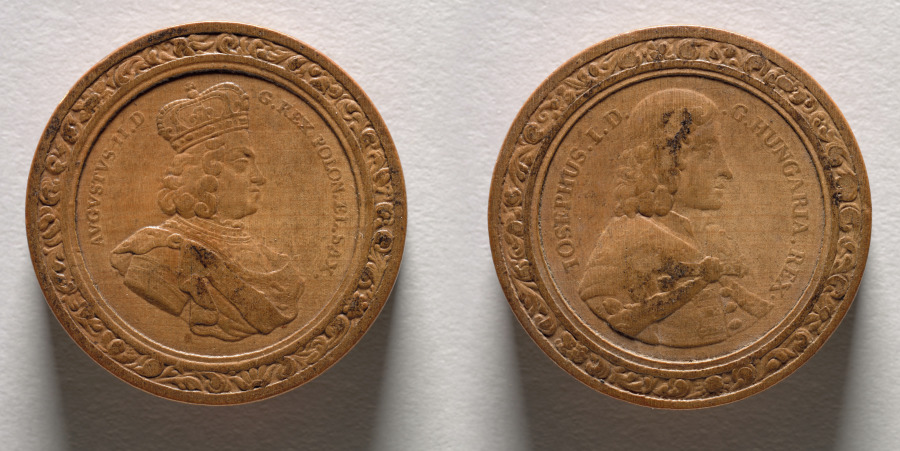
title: Gaming Piece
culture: Germany, late 17th-early 18th Century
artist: Martin Brunner (German, 1659–1725)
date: c.1700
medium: wood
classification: Furniture and woodwork